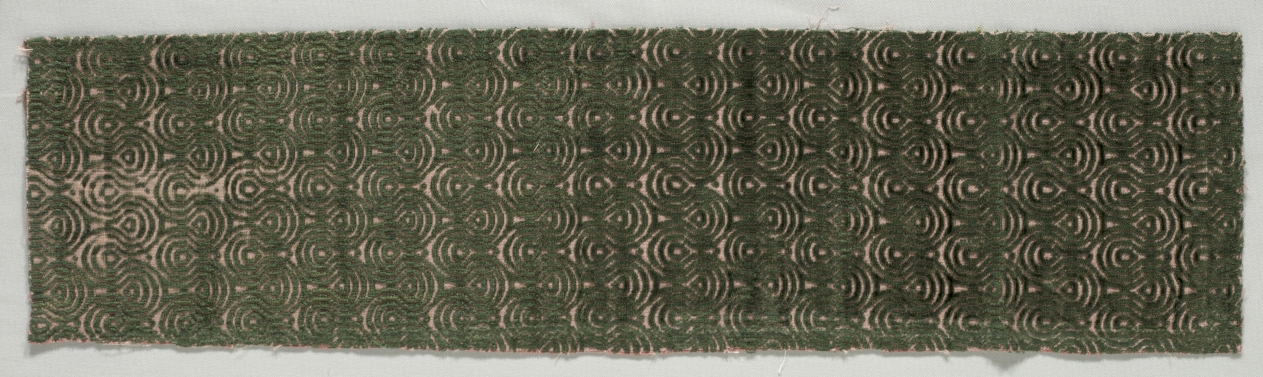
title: Velvet Fragment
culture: Italy ?, early 17th century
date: early 1600s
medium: velvet (cut and uncut); silk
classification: Velvet